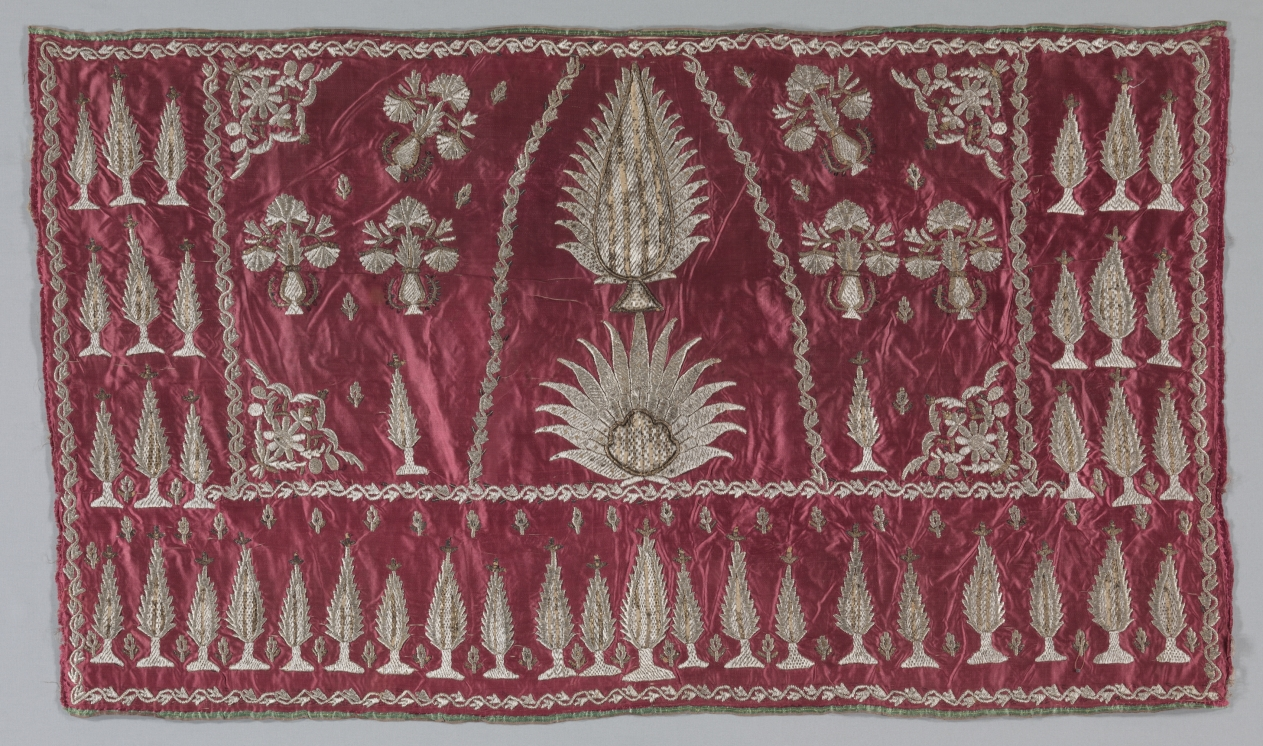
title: Embroidered Cover (?)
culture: Turkey, 18th-19th century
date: 18th-19th century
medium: embroidery: silver filé and gold strips over cotton thread, couched at edges by silk, on silk ground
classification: Embroidery